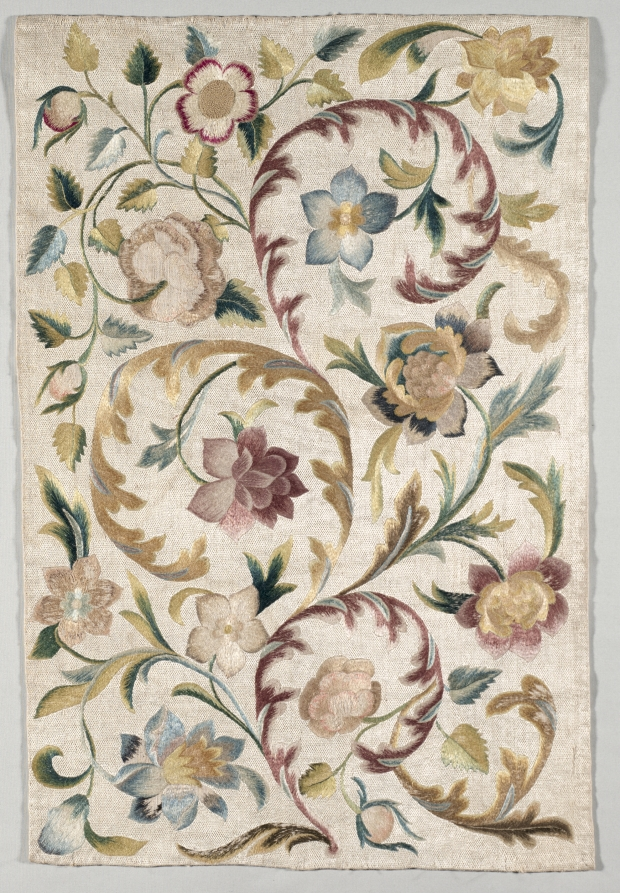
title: Embroidered Panel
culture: Italy, 19th century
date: 1800s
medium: embroidery, silk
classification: Embroidery